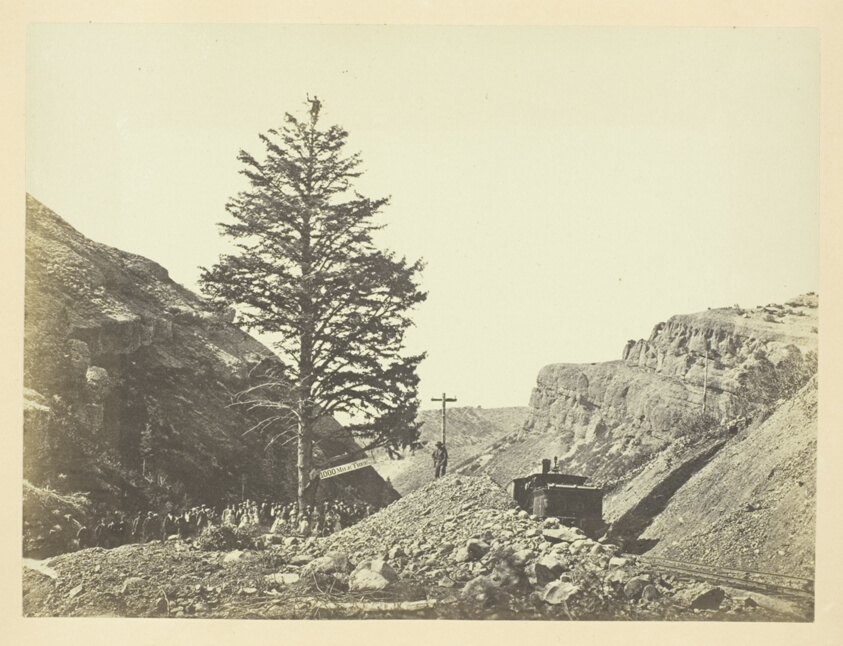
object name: Photograph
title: Thousand Mile Tree, Wilhelmina's Pass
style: 19th century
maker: Andrew J. Russell; American, 1830–1902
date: 1868/69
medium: Albumen print, pl. XIX from the album "Sun Pictures of Rocky Mountain Scenery" (1870)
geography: United States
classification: photograph; albumen silver print; photography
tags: Collected by Hugh Edwards